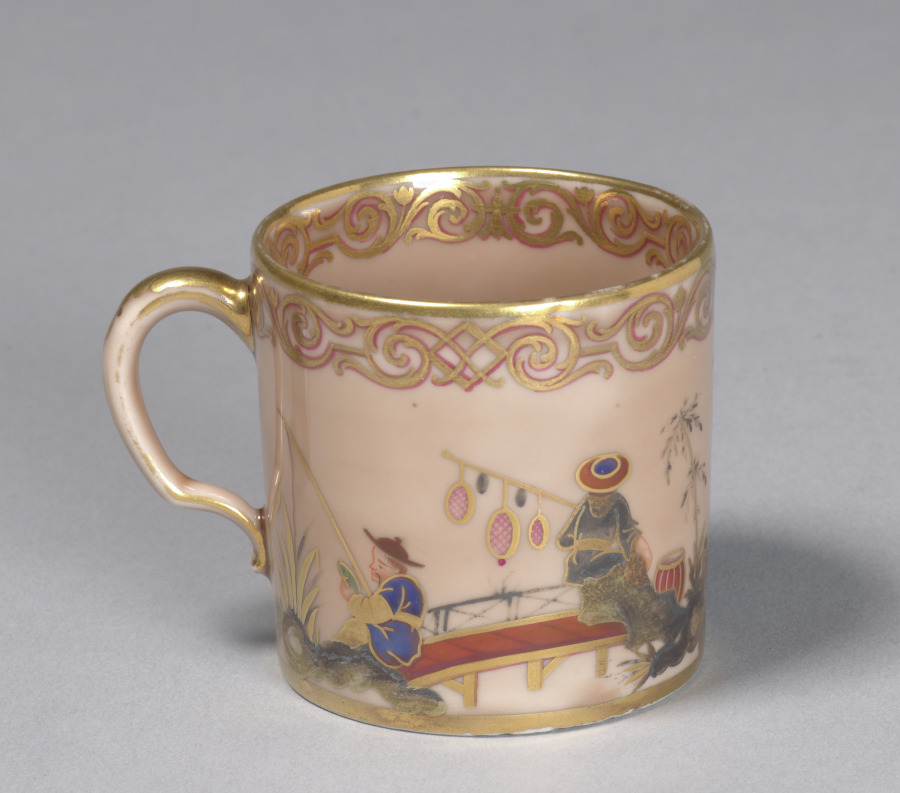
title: Cup (Gobelet litron)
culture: France, Sèvres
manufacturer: Sèvres Porcelain Factory (French, est. 1756)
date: 1778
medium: hard-paste porcelain with overglaze enamel decoration and gilt and silver decoration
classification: Ceramic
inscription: Interlaced Ls surmounted by a crown with date letters 'AA' enclosed; 'L.' below for Louis-François l'Ecot (in red)